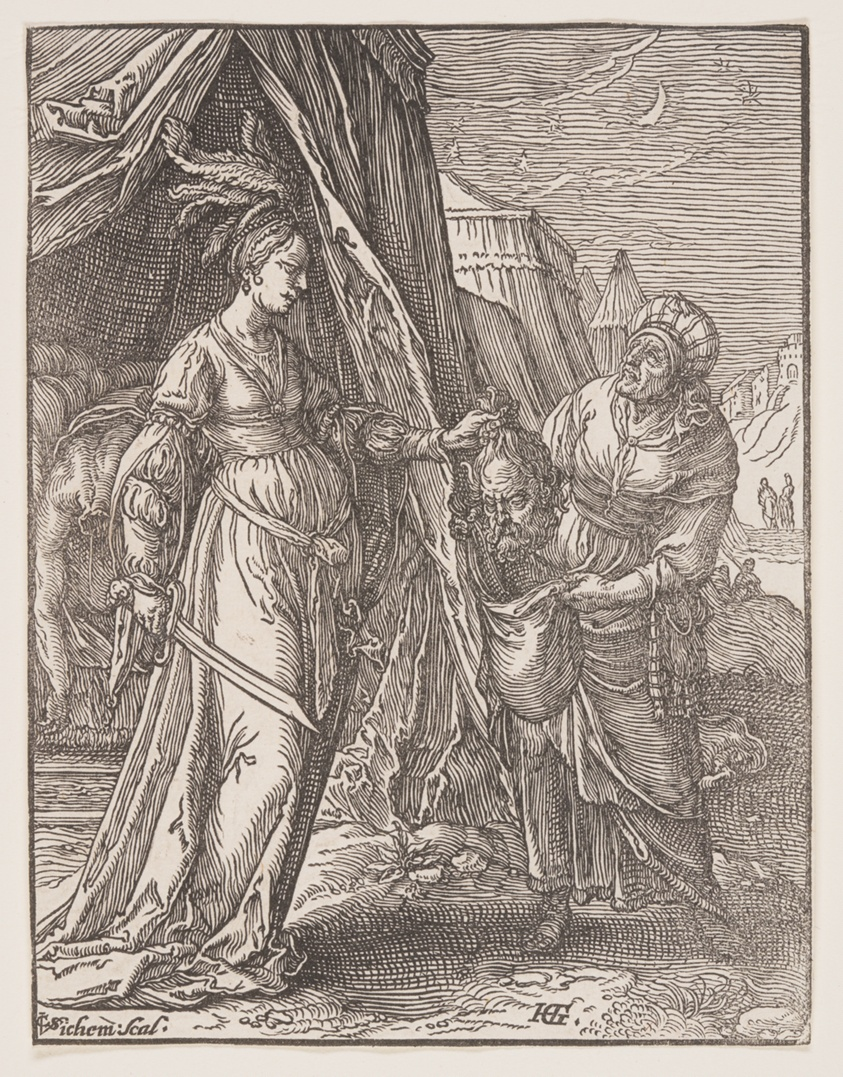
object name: Print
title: Judith with the Head of Holofernes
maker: Christoffel van Sichem I (Dutch, 1546-1624); after Hendrick Goltzius (Dutch, 1558–1617)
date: c. 1600-1610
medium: Woodcut on laid paper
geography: Netherlands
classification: woodcut; paper; print; prints and drawing